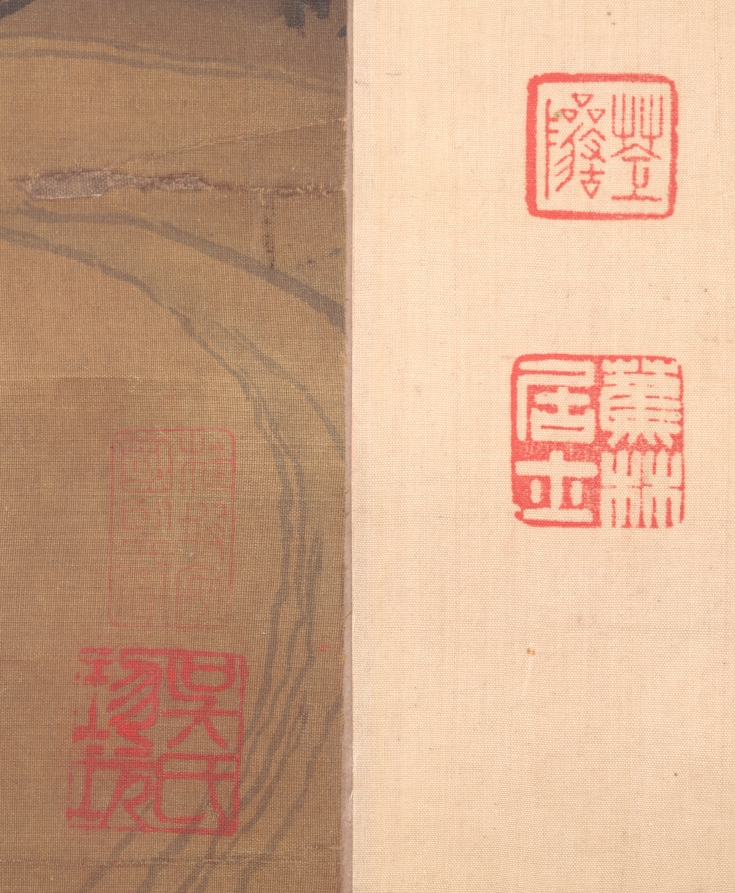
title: Bamboo and Ducks by a Rushing Stream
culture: China, Southern Song dynasty (1127–1279)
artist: Ma Yuan (Chinese, c. 1150–after 1255)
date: 1127–1279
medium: hanging scroll; ink and light color on silk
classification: Painting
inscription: 馬遠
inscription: 12 additional seals: 1 of An Kuo (1481–1534); 7 of Hsiang Yüan-pien (1525–1590); 2 of Liang Ch'ing-piao (1620–1691); 2 unidentified. (WKH)